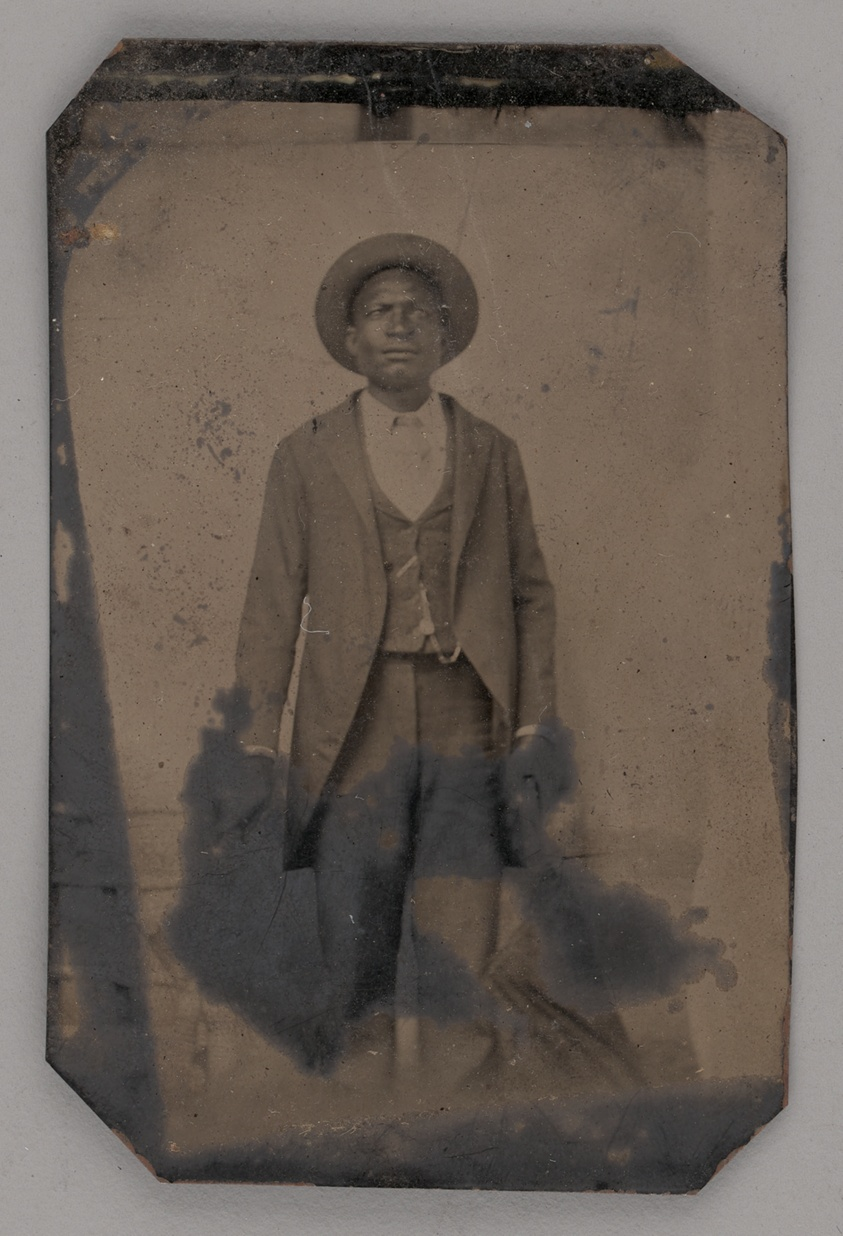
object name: Photograph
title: Untitled (Portrait of a Standing Man)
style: 19th century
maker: Unknown maker; American, 19th century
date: 1860s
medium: Tintype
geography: United States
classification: portrait; tintype; photograph; photographic process; photography; portrait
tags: portraits: African American subject, lundberg collection, African American, portraits, portraits: male subject, portrait, men, Male